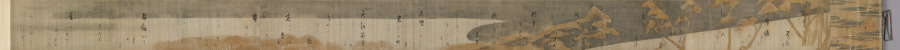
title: Selections from the Collection of Japanese Poems from Ancient and Modern Times (Kokin wakashū) with Design of Pines Along the Shore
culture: Japan, Momoyama period (1573-1615) to Edo period (1615-1858)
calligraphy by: Hon'ami Kōetsu (Japanese, 1558–1637)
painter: attributed to Tawaraya Sōtatsu (Japanese, c. 1570–c. 1640)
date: 1600s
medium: handscroll; ink on silk with gold and silver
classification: Calligraphy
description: The calligrapher and craftsman Hon’ami Kōetsu frequently collaborated with Tawaraya Sōtatsu, a painter who ran a studio that produced fans and screens. Sōtatsu’s work featured abstracted and flattened shapes, fields of color and gold, and asymmetry. In particular, motifs that appeared in small scale, such as flora and fauna, in early decorated Japanese papers were painted in a larger scale—blown up as if seen under a magnifying glass. For this handscroll, Kōetsu brushed poems from the autumn section of a poetry anthology onto silk with a landscape of pines in gold and silver likely painted by Sōtatsu.